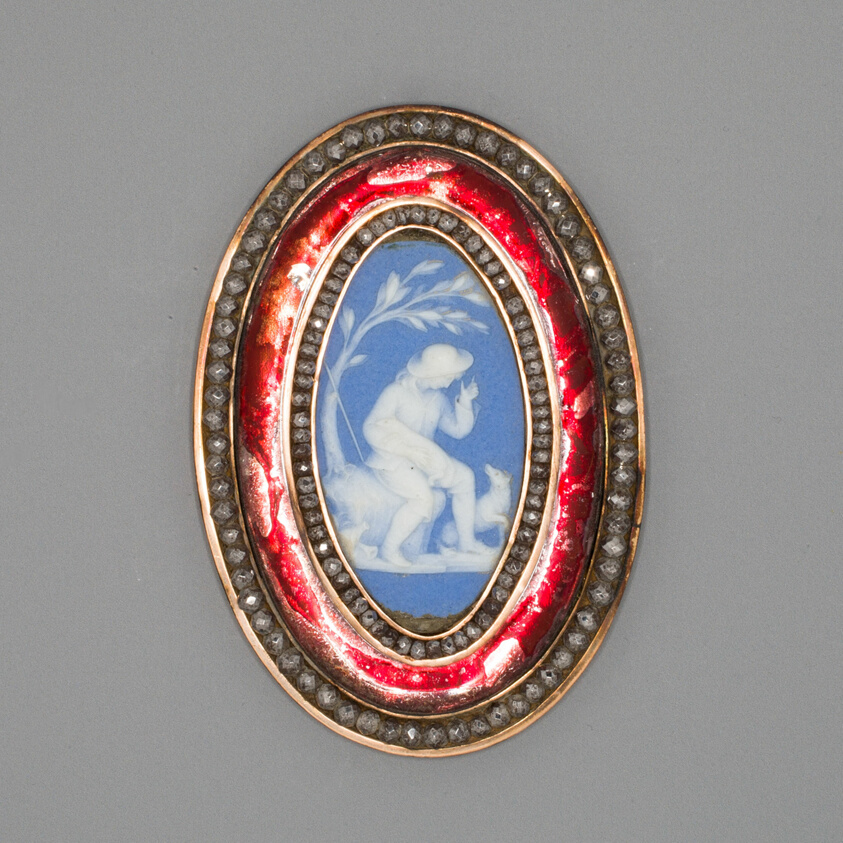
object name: Ceramics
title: Buckle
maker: Wedgwood Manufactory (England, founded 1759)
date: Late 18th century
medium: Stoneware (jasperware)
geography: Burslem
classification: buckle (strap accessory); accessories (object genre); costume accessory; stoneware; european decorative arts; ceramics